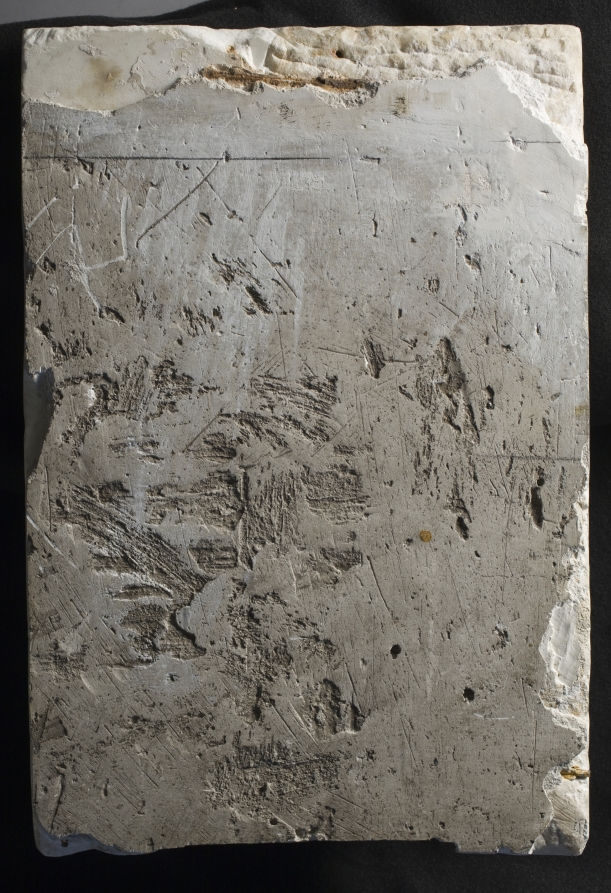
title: Aurelius Antoninus Pius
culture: Italy, Lombard School, late 15th century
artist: Gregorio di Lorenzo (Italian, c. 1436–1504)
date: late 1400s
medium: marble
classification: Sculpture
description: A laurel wreath rests on this Roman emperor’s finely articulated corkscrew curls, underscoring his military triumphs. While many ancient and classically inspired marble sculptures were painted, the survival of pigments is rare. In addition to the vibrant green coloring, traces of gold also remain on the leaves.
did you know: The artist can be identified by his distinctive flame-shaped curls forming the beard.